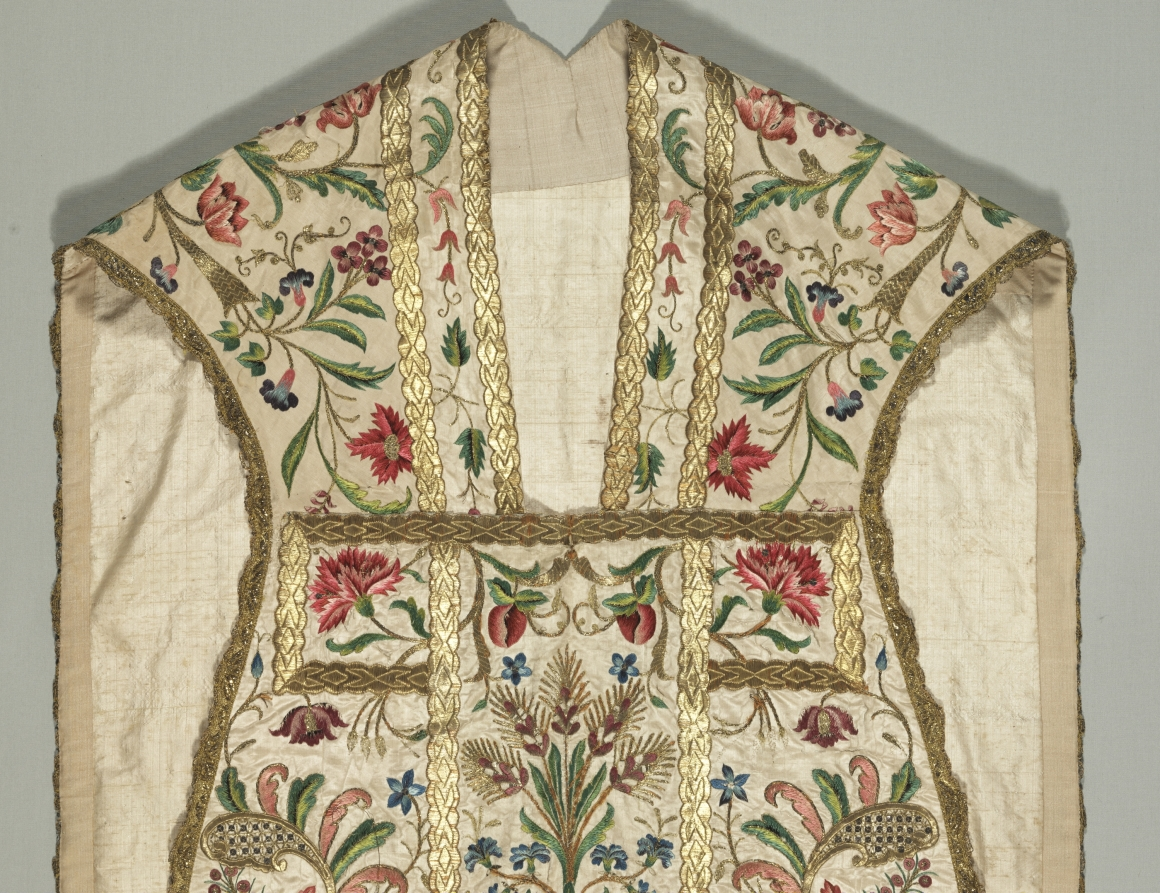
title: Chasuble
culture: Italy, 18th century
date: 1700s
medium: Silk and metallic threads; embroidery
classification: Textile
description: A beautiful design emanates from a vase in the center of this chasuble, displaying symmetrical flora that extend across embroidered gold braids into graceful curvilinear cartouches, reflecting contemporary architectural decoration. Also in the center, sheaves of wheat and grapes represent the bread and wine of the Mass. Gold sequins within thread-outlined squares illustrate fine quality workmanship. The decoration of the stole and chalice veil is similar to the chasuble, also on moiré (watered) silk fabric. The stole, an insignia of the office of deacons and priests, is worn under a chasuble, and the chalice veil—bearing the monogram of Jesus Christ, ihs, in the center—covers the chalice and paten (the plate holding the Eucharistic bread).